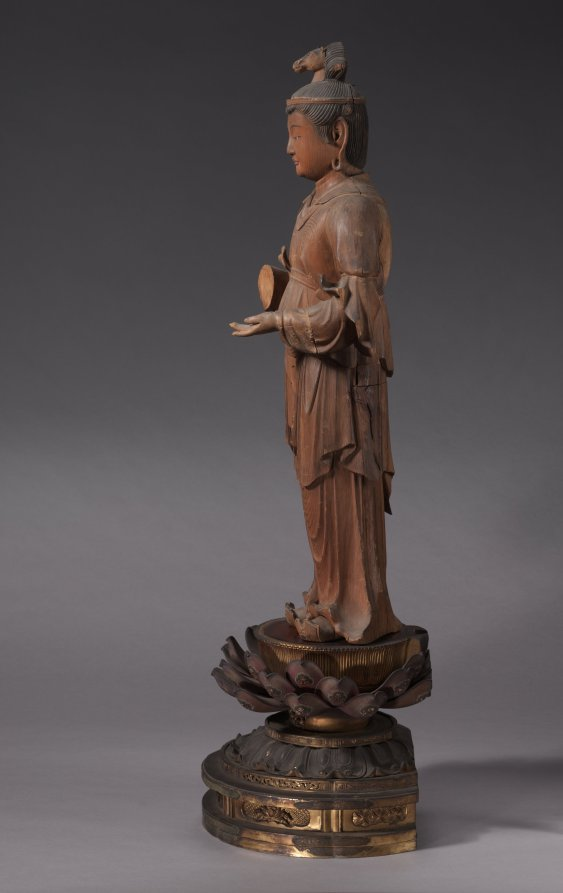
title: Batō (Horse-Headed) Kannon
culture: Japan, Kamakura period (1185–1333)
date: early 1300s, pedestal 1600s–1700s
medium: Wood with traces of color and gold; pedestal: wood with lacquer, color, and gold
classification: Sculpture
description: Batō Kannon, or Hayagriva Avalokiteshvara in Sanskrit, is the “horse-headed” form of the bodhisattva of compassion, who presides over the realm of animals in the Buddhist Six Realms of Transmigration (rebirth). A horse’s head appears in the hair of this sculpture to identify it. Bodhisattvas are beings who, though enlightened, choose to remain within the worlds of existence to help others. The six realms are heaven, hell, human, animal, hungry ghost, and ashura, or fierce supernatural entities.